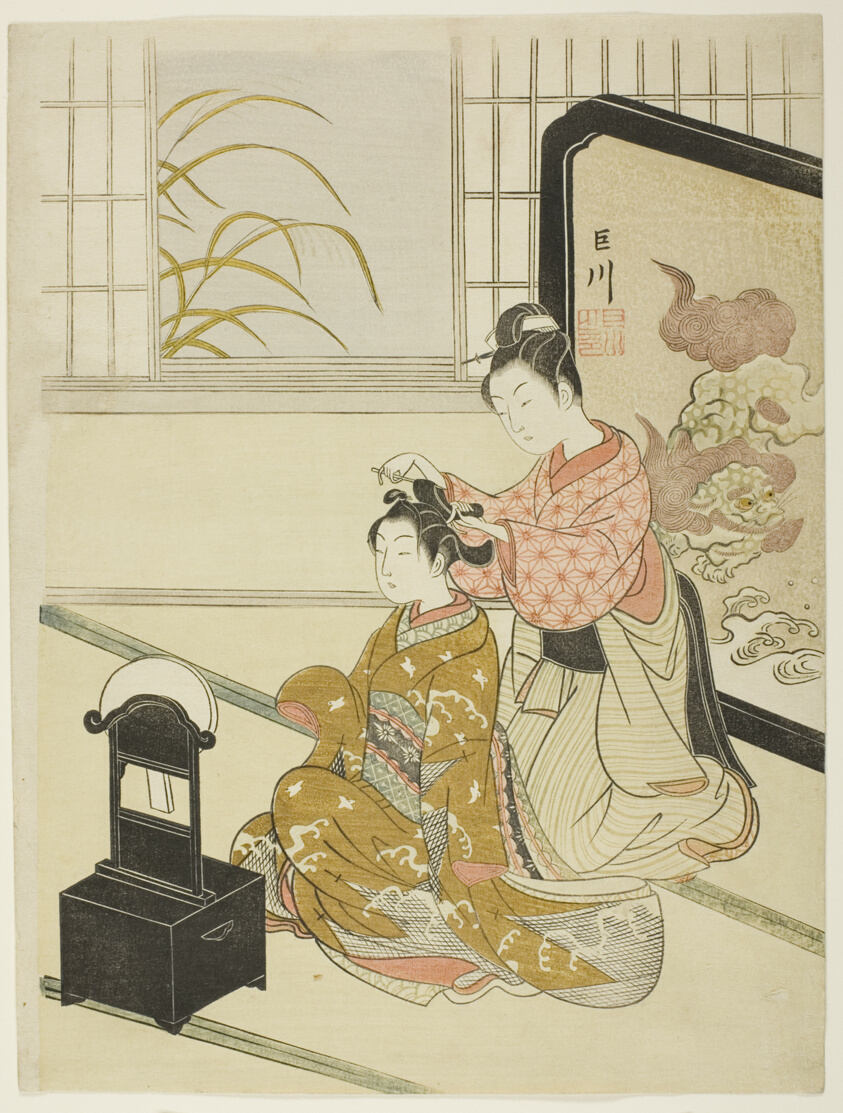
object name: Print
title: The Autumn Moon in the Mirror (Kyodai no shugetsu), from the series "Eight Views of the Parlor (Zashiki hakkei)"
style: Japanese (culture or style)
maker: Suzuki Harunobu 鈴木 春信; Japanese, 1725 (?)-1770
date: c. 1766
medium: Color woodblock print; chuban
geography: Japan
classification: woodblock print; print; asian art